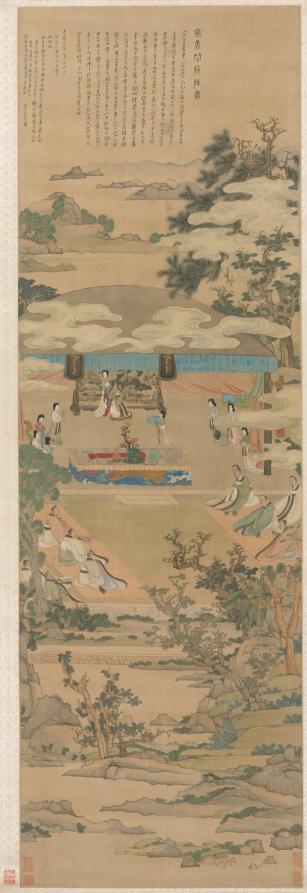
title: Lady Xuanwen Giving Instruction on the Rites of Zhou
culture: China, Ming dynasty (1368–1644)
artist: Chen Hongshou (Chinese, 1598/99–1652)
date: 1638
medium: Hanging scroll; ink and color on silk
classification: Painting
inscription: 宣文君者韋逞母宋氏也。父授以周官音義，曰：吾家世學傳周官。傳業相繼。此又周公所製，經紀〔典〕誥百官品物備於此矣。女可受之。君諷誦不輟。石帝徙山東。君乃推鹿車，背負父所授書到冀州。逞時年少。晝則採樵，夜則教逞。逞遂學成名立。仕符堅為太常。堅常幸其太學，問博士經典。乃憫禮樂遺缺。時博士盧壺對曰：廢學既久，書傳零落。比年綴撰，正經粗集。惟周官、禮經，未有其師。竊見太常韋逞母宋氏世學家，女傳其父業。得周官音義。今年八十。視聽無闕。非此母無可傳授後生。于是就宋氏家立講堂，置生員百二十人。隔絳紗縵而授業焉。拜宋氏爵，號為宣文君。賜侍婢十人。周官學後行于世。 崇禎戊寅八月二日，為綬姑六旬之辰。綬弟自成為姑偦。偕姑季女駱密、外孫楹、楠、楩、橒、楞、棅、孫女惠、漉酒上壽，屬綬圖寫，所以頌祝者。綬思宋母尚五胡之時，經藉屬之婦人；今太平有象，而秉杖名義者，獨綬姑爾。敬寫此圖，且厚望于弟紹焉。猶子洪綬九頓首。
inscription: 5 additional seals: 2 of Xu Weiren 徐渭仁(1788－1855); 2 of Sun Zutong 孫祖同 (1894–1937); 1 of C. C. Wang 王季遷 (1907–2003).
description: This painting by Chen Hongshou depicts the story of Xuanwen Jun, or Lady of Literary Propagation, at a venerable age, instructing young scholars on the Confucian classics. It was painted for Chen’s aunt in celebration of her 60th birthday. Chen’s painting style is archaic in the use of fine outlines and brilliant coloring with mineral pigments. In depicting the figures, he uses the “iron-wire” brush style (fine, even lines) with deliberate control. The faces are elongated and exaggerated. A few ritual bronzes lend the scene an antique flavor.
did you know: Chen Hongshou's long inscription at the top of the painting compares his virtuous aunt with the historical exemplar, Lady Xuanwen.